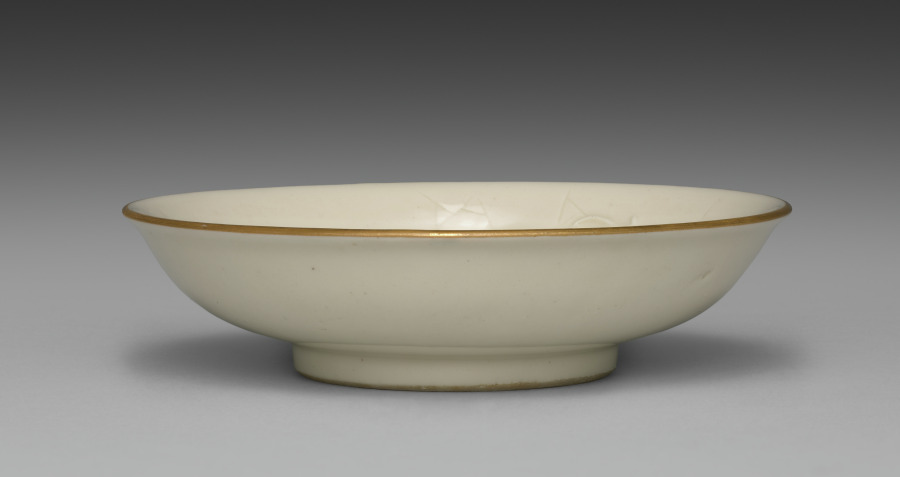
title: Small Dish from Dining Set with Plum Blossoms and Cracked-Ice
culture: Japan, Meiji period (1868–1912)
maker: Seifū Yohei II (Japanese, 1844–1878)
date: c. 1875–78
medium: Porcelain with molded designs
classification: Ceramic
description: Each item in this set has a delicate low-relief design of flowering plum branches over scattered, intersecting lines meant to resemble the cracked-ice surface of a frozen body of water and is signed on the base in gold pigment. While Yohei II produced many fine works in underglaze blue, like those produced by Kiyomizu Shichibei, he also made works in quite different styles later in his career, from the early 1870 s. In 1873, he was appointed purveyor to the Industrial Center of Kyoto Prefecture, a designation associated with Kyoto’s efforts to reach an international market through the port of Kobe; and from 1875 until his death, he was involved in national-level projects to present Japanese ceramics across the world. It was during this period that Yohei III was apprenticed to Yohei II, and it has been suggested that this set may in fact be an early example of Yohei III’s work, which he signed with his teacher’s name. Decorated with flowers resembling Japanese textile motifs, the set calls to mind the design of Yohei II’s pair of vases with plum blossoms in the Victoria and Albert Museum. Here, the elaborate trees created for a formal public exhibition setting have been translated into the approachable blossoms of the genteel domestic environment. While the designs are consistent across the pieces, each raised flower petal and pistil and each incised line in the ice was done by hand, so the cups, bowls, and dishes are similar yet unique. The bottoms of two boxes once identified the set’s owner, but the information has been deliberately obscured with black ink. However, inscriptions still visible appear to indicate two occasions, once at the end of July 1886 , and once again in June 1916 , when parts of the set were requested from Hokura in Niigata Prefecture. The location corresponds to a neighborhood in the present-day city of Jōetsu. The surname Tsuji 辻 also appears on a paper tag affixed to one of the box cloths. Future research may possibly reveal more about their provenance. A vase by Yohei III in a private collection combines the formal grandeur of the Yohei II vases in the Victoria and Albert Museum with the gentler design of this dining set, placing flowering plum trees against soft, scalloped-edge clouds resembling those in golden screens.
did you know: The dining wares have a creamy white coloration that the four boxes containing them identify as Korean in style.